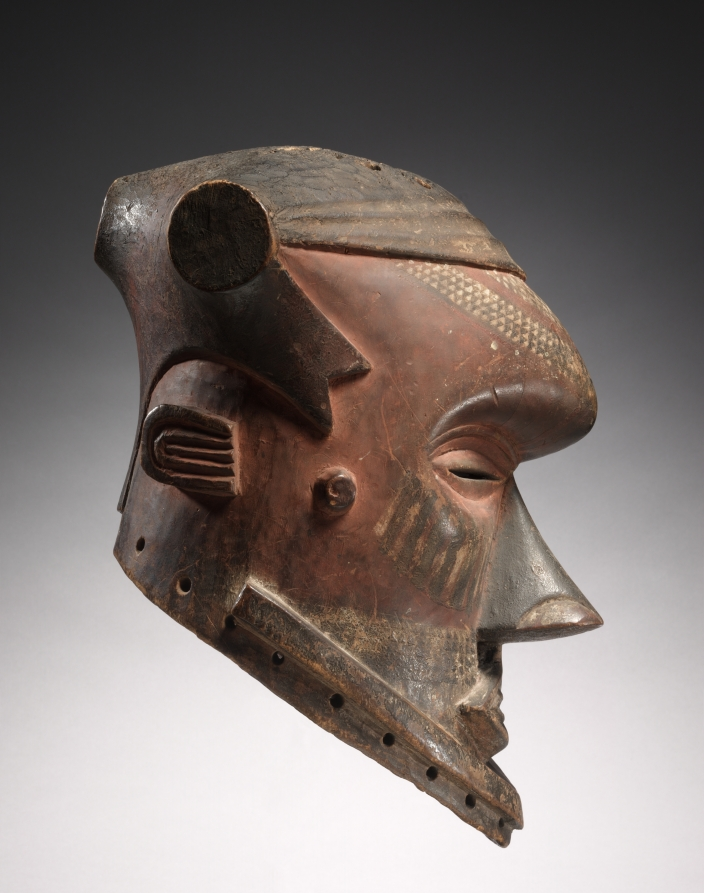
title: Mask (Bwoom)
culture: Africa, Central Africa, Democratic Republic of Congo, Kuba-style carver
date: mid- to late 1800s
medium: Wood and paint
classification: Mask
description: Among the Bushoong, the central Kuba group, the mask known as bwoom—most typically identified as the head of a hunter-gatherer—forms a triad with a female mask and another male mask. All three are protagonists in the reenactment of the foundation of the Kuba kingdom. Outside the capital, however, bwoom appears in different non-royal contexts, such as the men’s initiation society.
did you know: Imagine this mask topped with eagle feathers; they would have been added only on special occasions when it was performed.